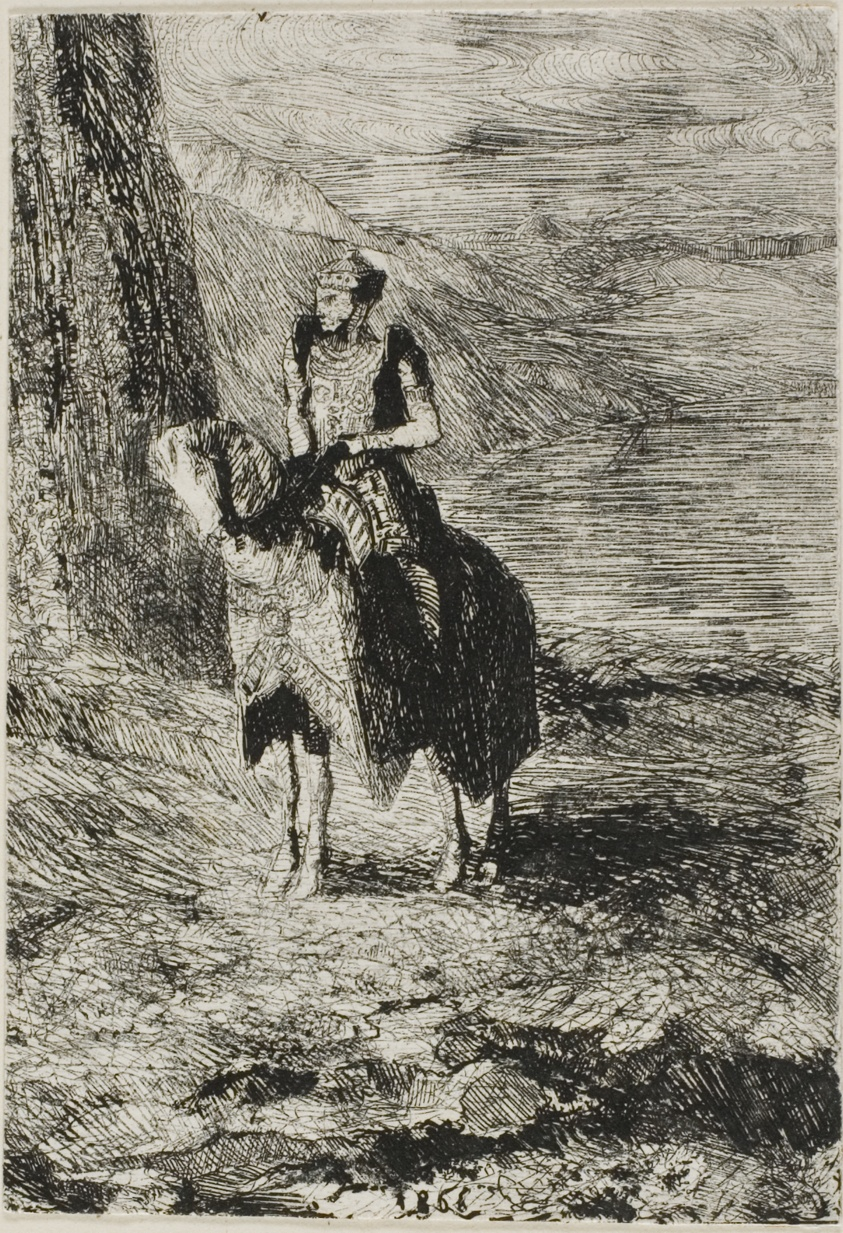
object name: Print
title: Horseman Waiting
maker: Odilon Redon (French, 1840-1916)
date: 1866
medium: Etching on ivory wove paper, cut down within plate mark and mounted on ivory wove card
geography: France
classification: etching; print; prints and drawing; paper